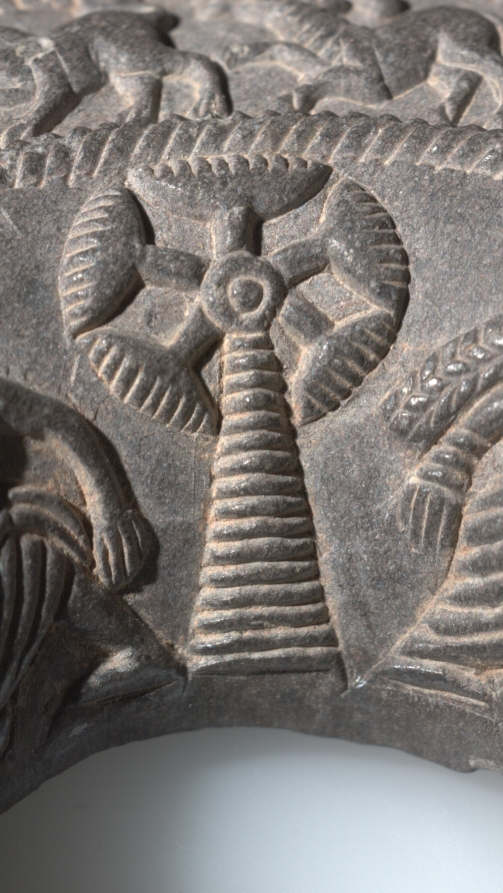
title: Ringstone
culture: India, Maurya period (322–185 BCE)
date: 200s BCE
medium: steatite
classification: Sculpture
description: Ringstones are among the earliest works of art to be created in stone during India's historical period. This example is finely carved with detailed images of affectionate couples and palm trees, running animals, and geometric motifs in concentric circles. The function of ringstones remains uncertain, since none of the surviving examples is inscribed or explained in a text.